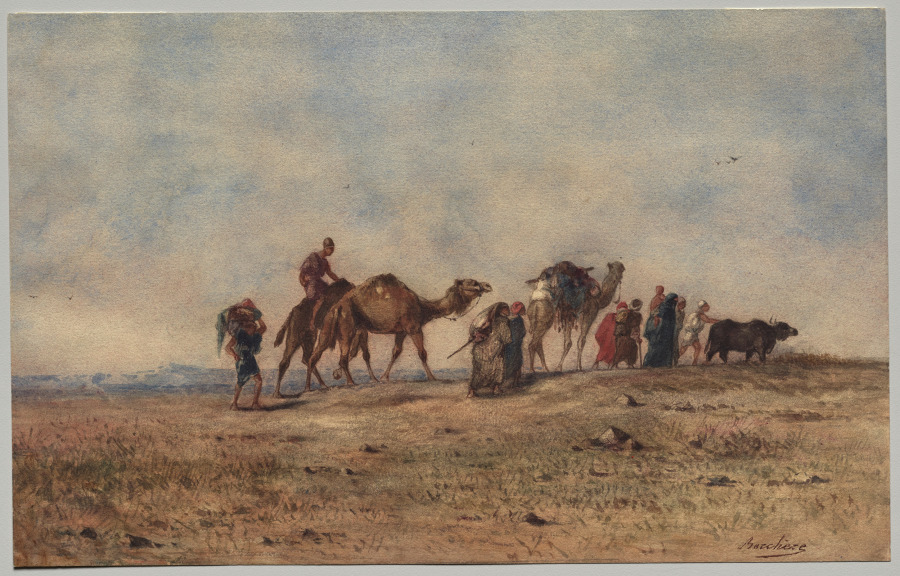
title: A Caravan in the Desert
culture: France, 19th century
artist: Narcisse Berchère (French, 1819–1891)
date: c. 1860s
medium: watercolor on wove paper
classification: Drawing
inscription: Watermark: J WHATMAN, at lower margin on verso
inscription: Signed, at lower right, in ink: “Berchère.”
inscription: Inscribed, on verso, at upper left, in pencil: “18”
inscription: Inscribed on verso at lower center margin, in pencil: “2[?]102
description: This drawing is one of many in which Narcisse Berchère depicted the desert landscape of Egypt—which France had attempted to colonize just a few decades before. Here, a party of travelers walks through a flat and expansive space accompanied by camels. After studying in Paris, Berchère made his first of several trips to North Africa, which served as inspiration for much of his work.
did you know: In addition to making numerous watercolors depicting Egypt, Narcisse Berchère published a book about his travels there.